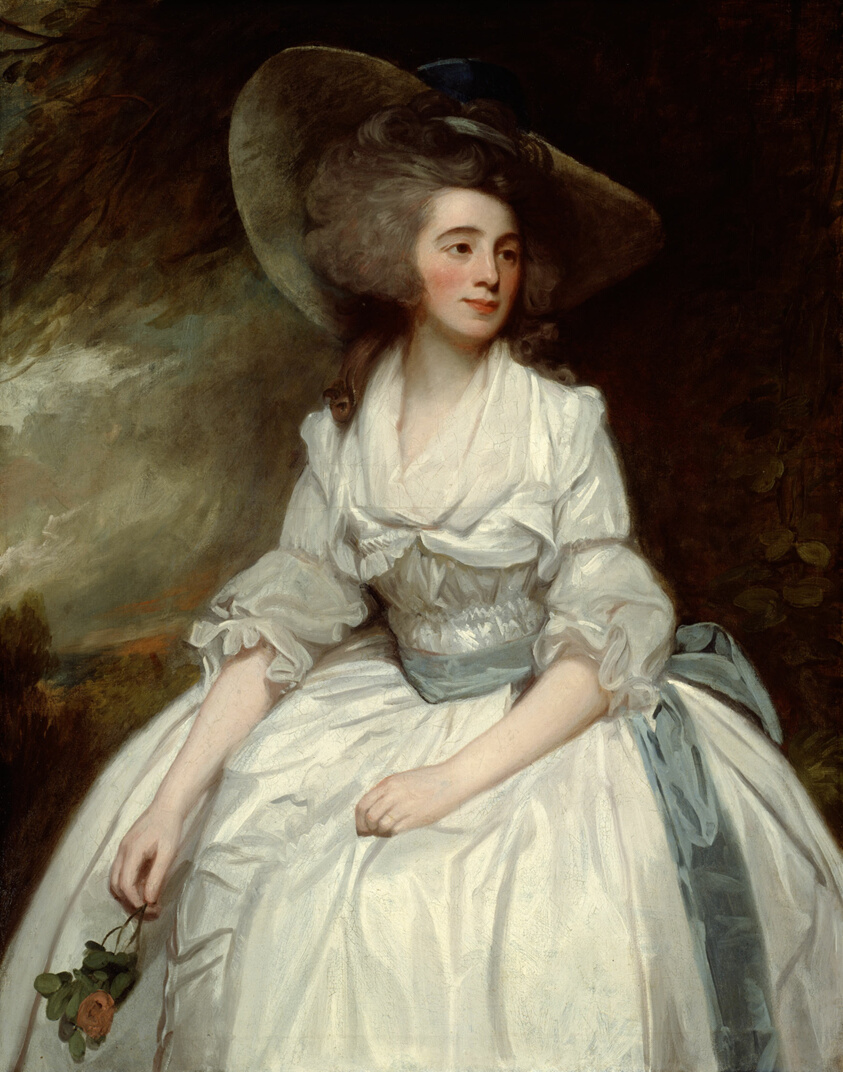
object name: Painting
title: Mrs. Francis Russell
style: 18th Century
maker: George Romney (British, 1734–1802)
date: 1785/87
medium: Oil on canvas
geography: England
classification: oil on canvas; portrait; paint; oil paintings (visual works); british; painting; european painting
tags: portraits: female subject, portrait, portraits, woman, hat, dresses, white (color), blue, blue (color), rose (color), roses, flowers, foliage, landscape, trees, bushes, wealth, luxury, Century of Progress, world's fairs, Chicago World's Fairs